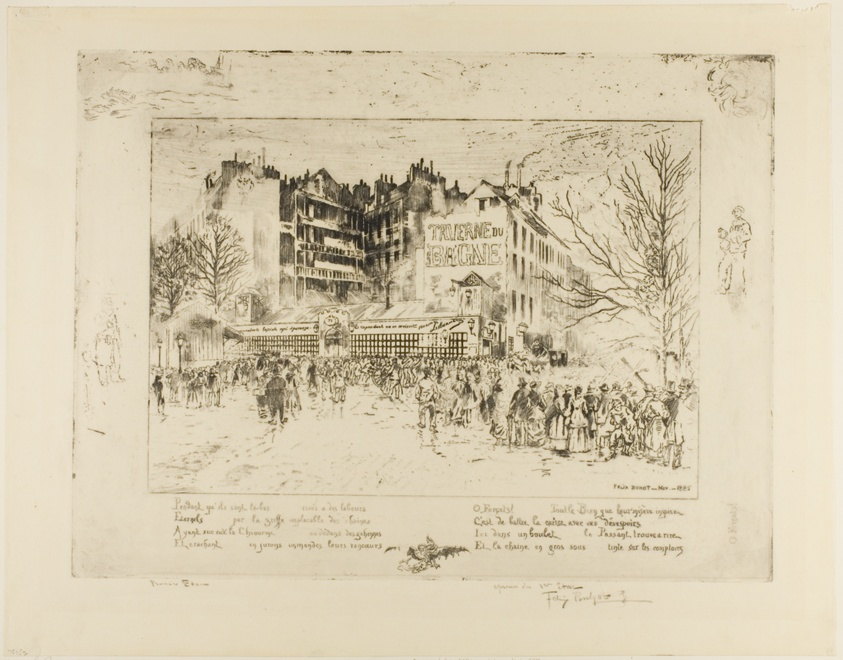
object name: Print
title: The Place des Martyrs and the Jailhouse Tavern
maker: Félix Hilaire Buhot (French, 1847-1898)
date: 1885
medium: Soft ground etching on paper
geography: France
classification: etching; print; prints and drawing